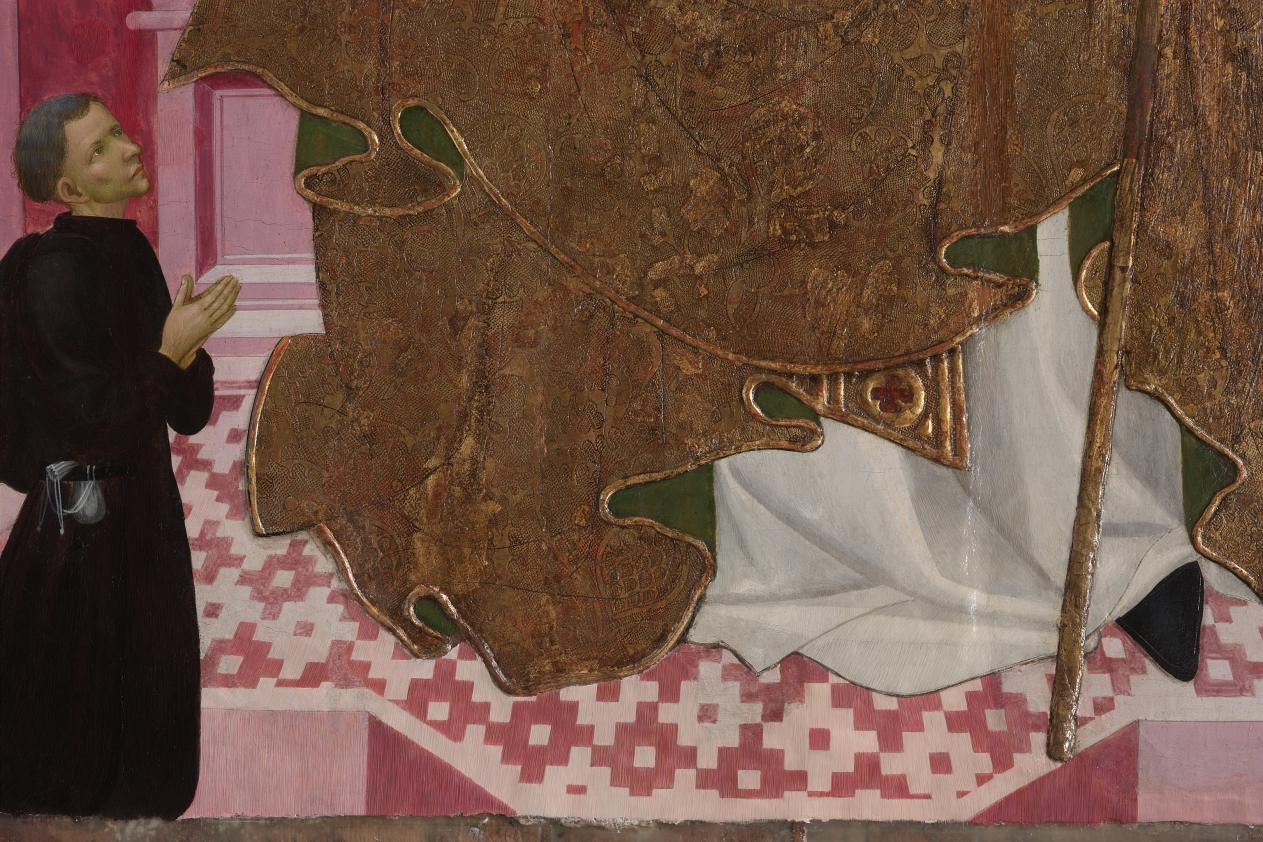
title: A Bishop Saint with a Donor (Saint Louis of Toulouse?)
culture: Spain, Catalonia, early 15th century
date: early 1400s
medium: tempera with raised and gilded gesso on wood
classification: Painting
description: The style of this painting suggests that it comes from Catalonia in northeastern Spain, though the identity of its artist remains unknown. The painting represents a youthful bishop-saint identifiable by a bishop’s symbols of authority, his miter and crozier. He wears rich vestments. Below, the figure in black represents the donor of the painting—likely a wealthy layperson rather than a cleric. The identity of the saintly bishop is speculated to be Saint Louis, Bishop of Toulouse, on the basis of his youth. Louis was consecrated Bishop of Toulouse in 1297, died six months later at the age of 23, and was canonized in 1317. His relics were moved in 1423 to Valencia and his cult flourished in Spain.